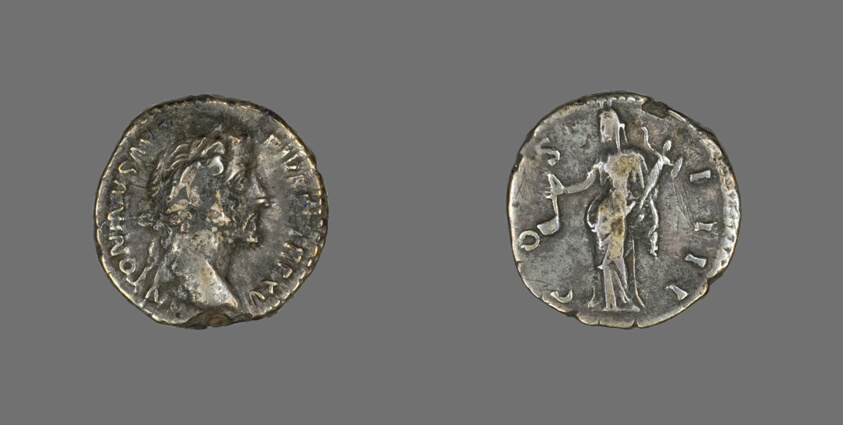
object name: Coin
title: Denarius (Coin) Portraying Emperor Antoninus Pius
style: roman (ancient, style or period), ancient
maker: Roman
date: 151-152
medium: Silver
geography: Roman Empire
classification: coin; ancient art